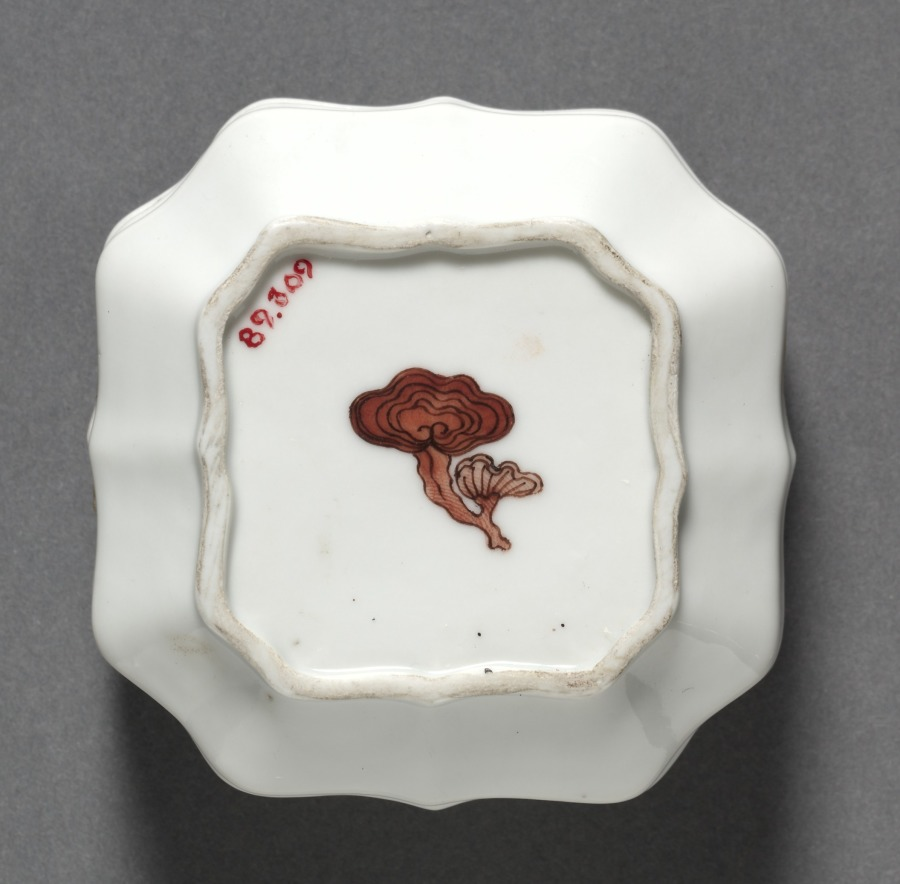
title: Square Covered Box with Hundred Antiquities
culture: China, Jiangxi province, Jingdezhen kilns, Qing dynasty (1644-1911), Yongzheng mark and reign (1723-35)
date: 1723–35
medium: porcelain with famille rose overglaze enamel decoration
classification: Ceramic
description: The painted decoration on the cover that pairs with this base provides an interesting image of the antiquities and objects being collected in the Chinese scholar’s desk—all of which are emblems of taste, status, and affluence. Connoisseurship, art cataloguing, art historical study, and elegant social gatherings developed alongside art collecting as part of the Chinese literati culture.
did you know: An auspicious lingzhi mushroom was painted on the base.